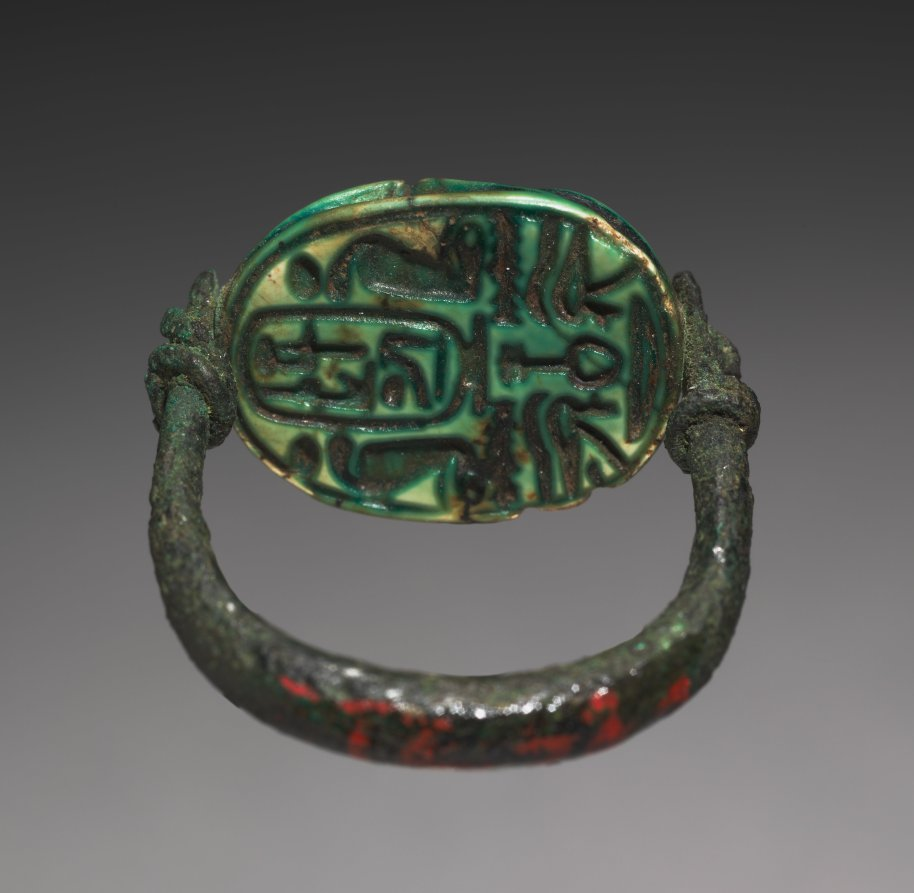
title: Scarab Ring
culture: Egypt, New Kingdom (1540–1069 BCE), Dynasty 19, reign of Ramesses II (1279–1213 BCE)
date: 1279–1213 BCE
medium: green glazed steatite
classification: Scarabs